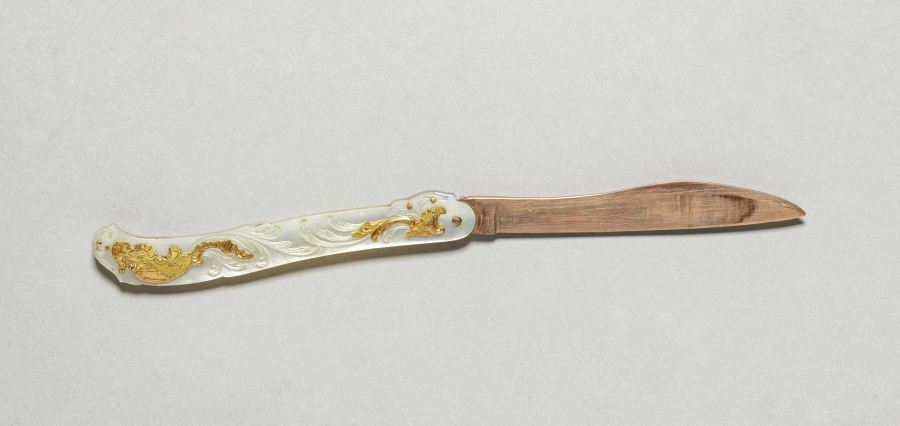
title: Pen Knife from a Sewing Box (Nécessaire)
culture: Austria, possibly Vienna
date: c. 1765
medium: gold and mother-of-pearl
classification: Miscellaneous